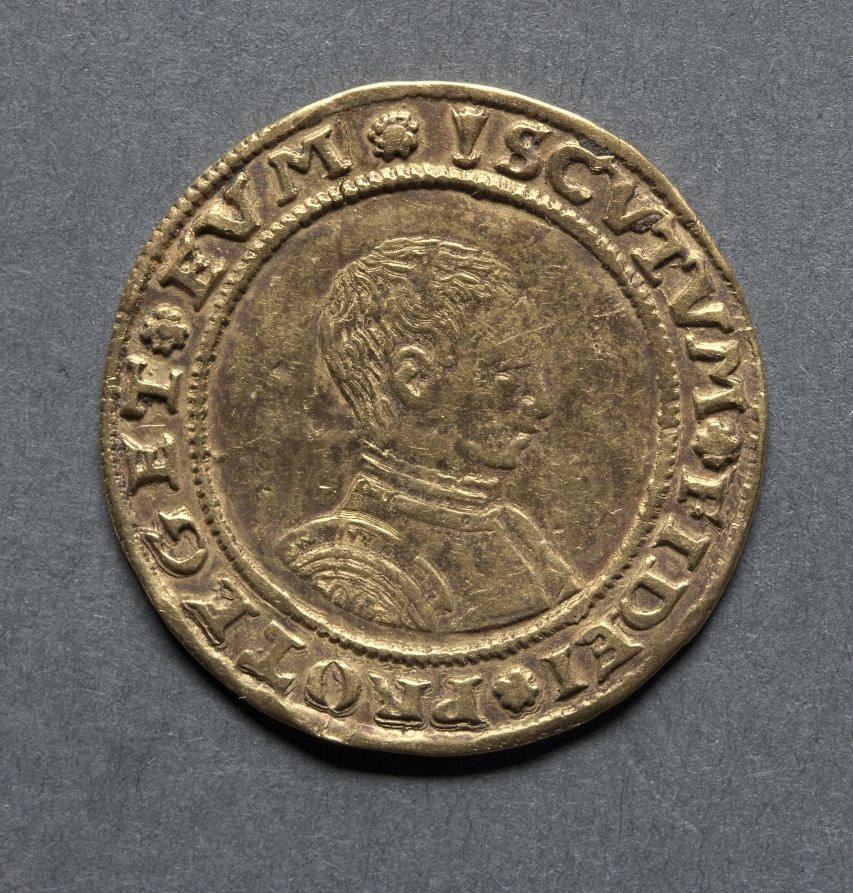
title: Half Sovereign: Edward VI (obverse)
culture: England, Edward VI, 1547-1553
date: 1549–1550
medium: gold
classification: Coins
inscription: SCVTM FIDEI PROTEGET EVM